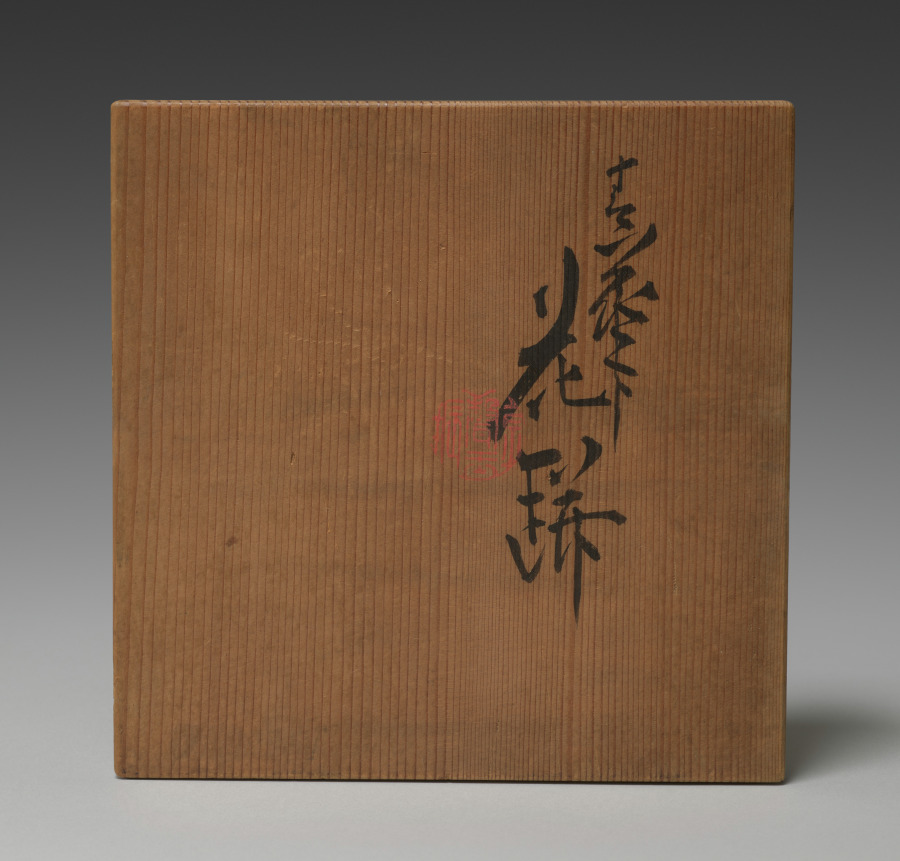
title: Flower Vase with Floral Scroll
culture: Japan, Meiji period (1868–1912)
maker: Seifū Yohei III (Japanese, 1851–1914)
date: 1893–1914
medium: Porcelain with underglaze colors and green glaze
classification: Ceramic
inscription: 清風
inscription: 帝室技芸員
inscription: 金聲玉振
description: The upper part of this vase is painted in underglaze blue with a floral scroll of leaves accentuated with a single chrysanthemum motif on each face and bound at top and bottom with single blue lines. The box lid for the vase is short on detail; the inscription notes only that it is a flower vase with underglaze blue. It is possible that the box is a mismatch because the inscription does not mention the vase’s more distinctive feature: the deep green glaze on its lower half, which is seen much less frequently among Yohei III’s works. This glaze may be an example of a dark green porcelain glaze called rōkanji, which the artist invented in 1892. The name of the glaze comes from Chinese, in which it is pronounced langgan. It may literally mean “tinkling sound of jade” and could refer to malachite, among other proposed identifications.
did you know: The center of each chrysanthemum has a crescent-shaped design at the top filled with a very pale yellow wash under the transparent glaze.